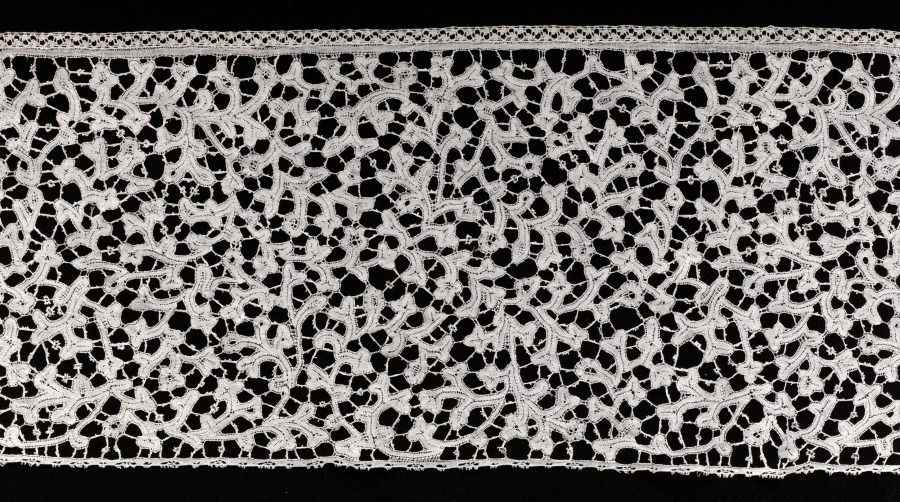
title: Lace Flounce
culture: Italy, Milan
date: 1500s–1600s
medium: Bobbin lace (Punto di Milano)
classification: Lace